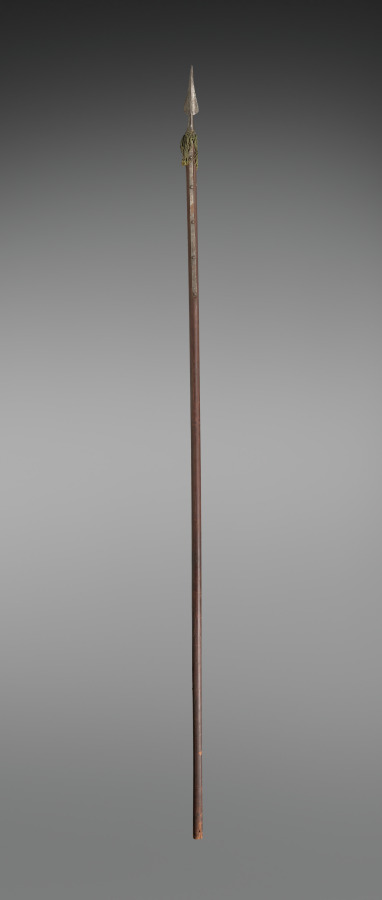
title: Pole for Banner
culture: Spain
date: 1700s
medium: wood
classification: Arms and Armor